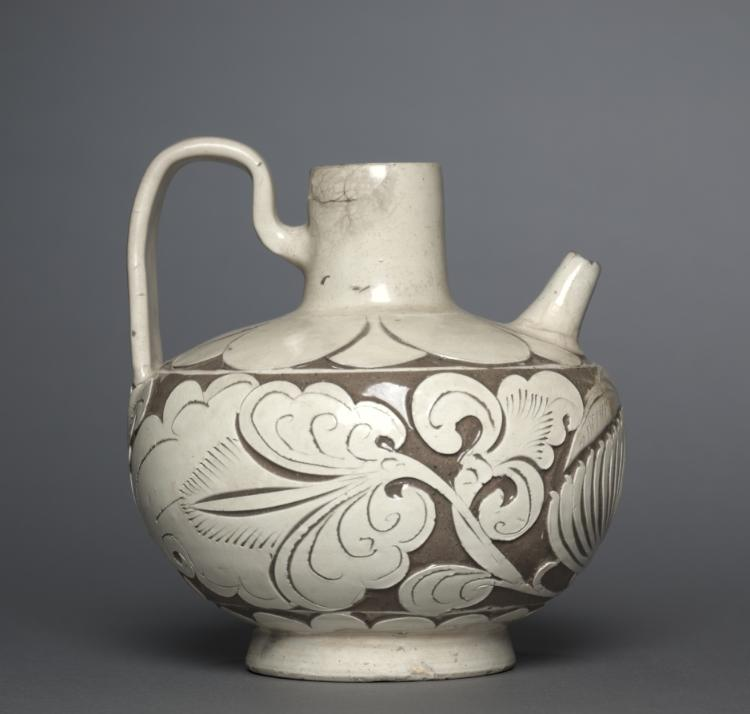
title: Spouted Ewer with Handle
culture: Northern China, Northern Song dynasty (960-1127)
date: 900s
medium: glazed stoneware with carved decoration, Cizhou ware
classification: Ceramic